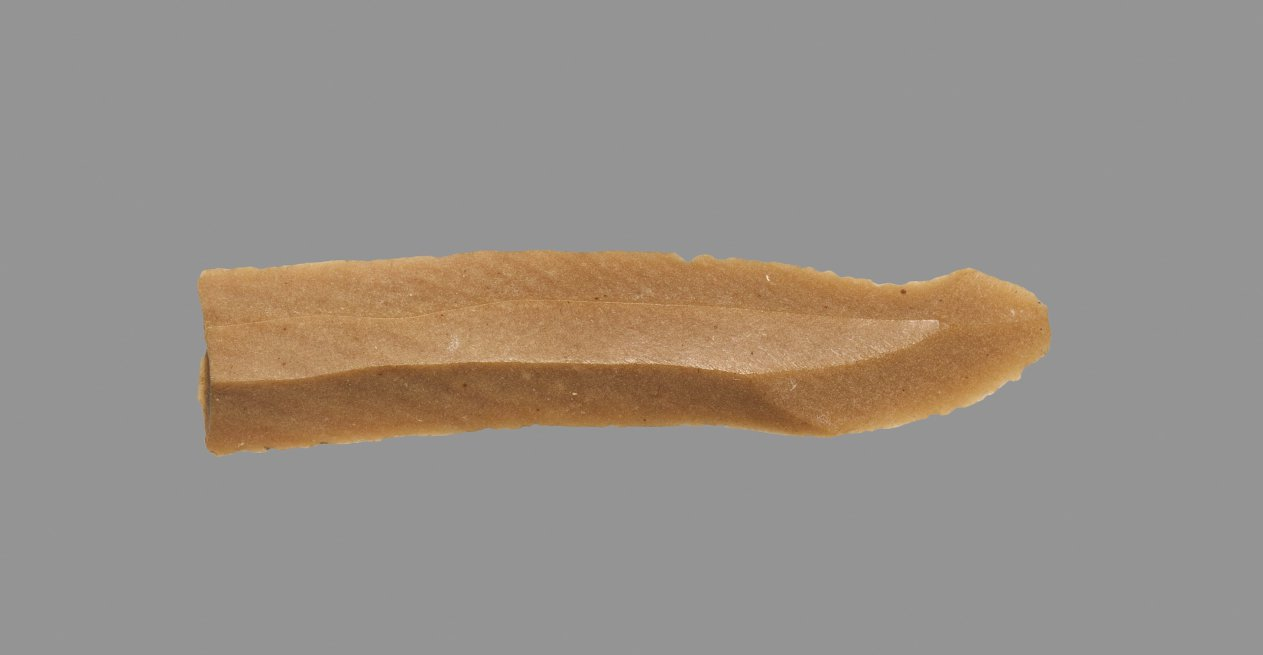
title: Sickle Blade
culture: Egypt, Middle Kingdom (2040–1648 BCE), Dynasty 12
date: 1980–1801 BCE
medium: flint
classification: Implements